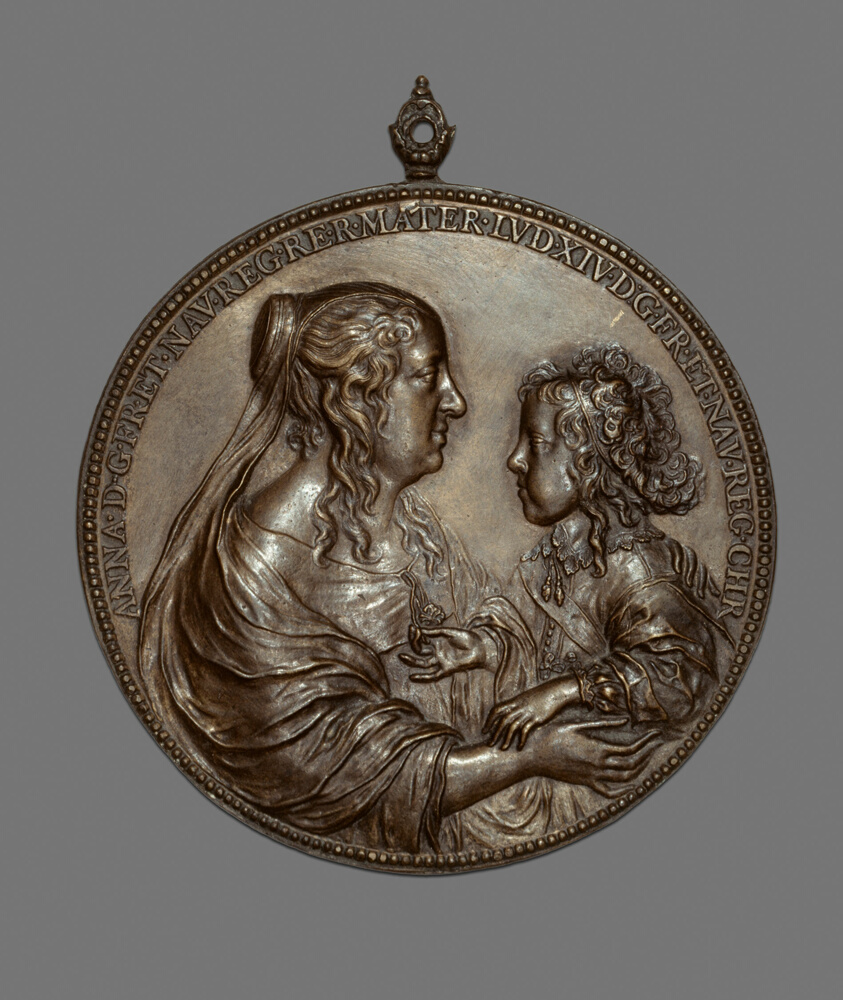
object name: Medals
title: Portrait Medallion: Anne of Austria and her Son, the future King Louis XIV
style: 17th Century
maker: Attributed to Jean Warin, II (French, 1607–1672)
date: 1638/48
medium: Patinated bronze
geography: France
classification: medal; medal/plaquette/coin; sculpture; bronze; french; metal; portrait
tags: portraits: multiple subjects, tassels, woman, royalty, royal, nobility, children, child, mother and child, sons, mother, portraits, portraits: child subject, portrait, portraits: female subject, portraits: male subject